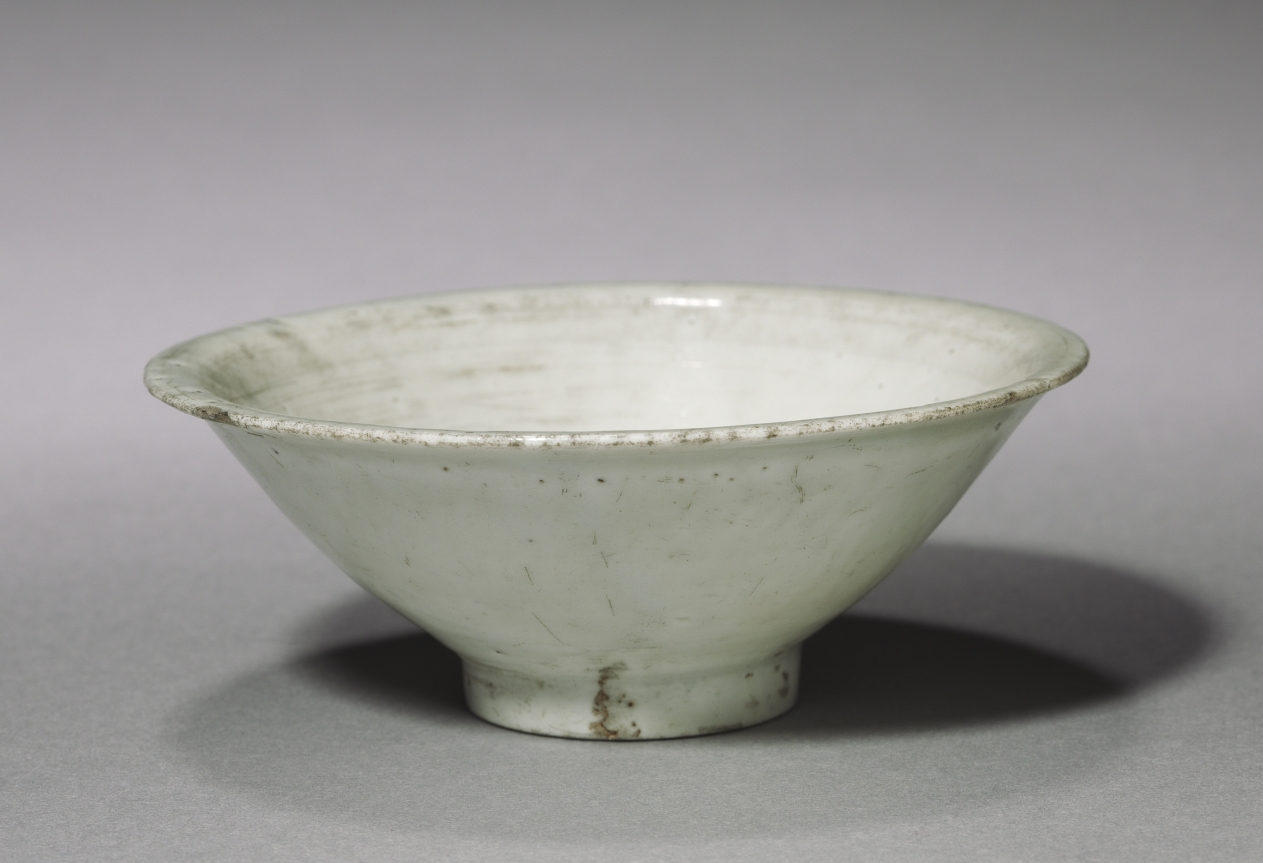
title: Bowl with Carved Design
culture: Korea, Goryeo dynasty (918–1392)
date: 1000s–1100s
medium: pottery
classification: Ceramic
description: As early as the seventh century, the practice of drinking tea and wine became an important part of elite leisure culture in Korea. A wide bowl like this example was especially suitable for drinking powdered tea shaved from a compressed tea cake, the most commonly enjoyed type during the Goryeo period.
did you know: This white bowl is highly likely to have served as a tea bowl.